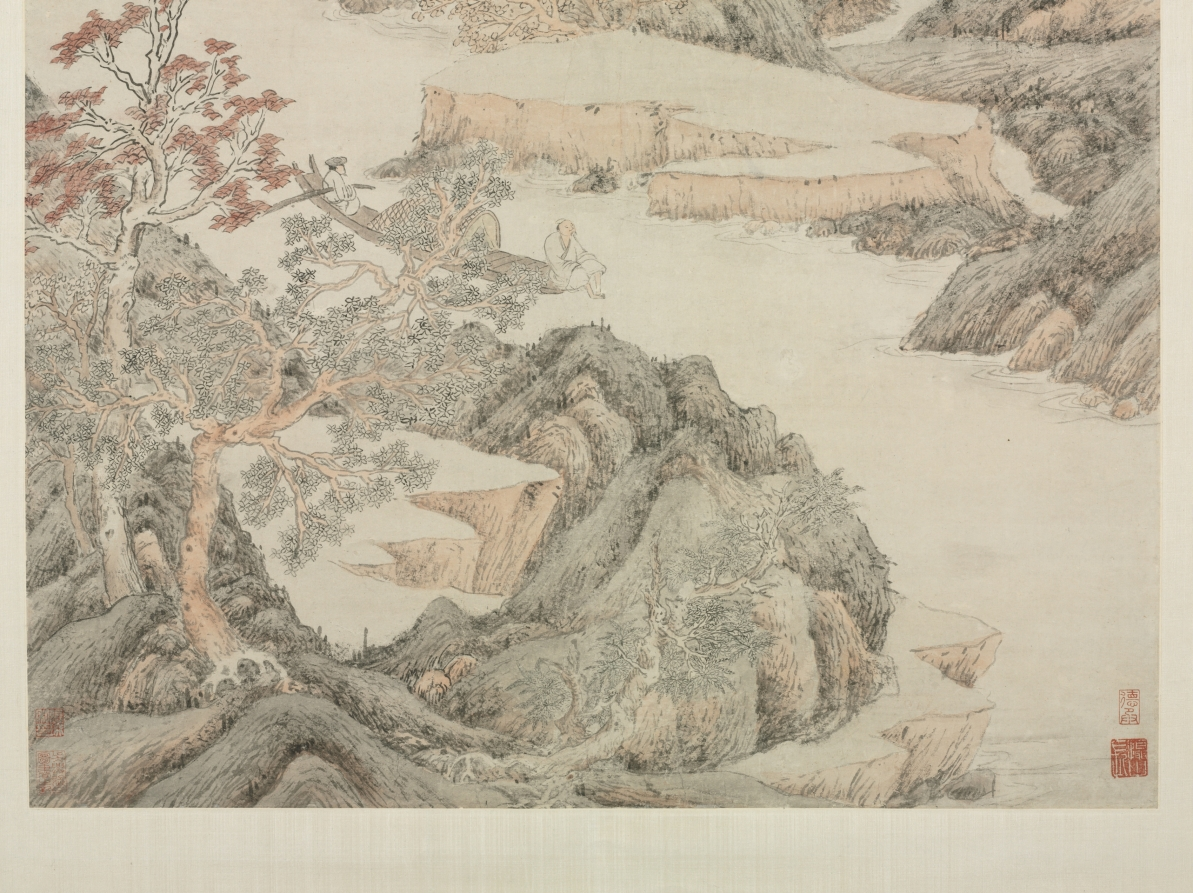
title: Washing the Feet (from the Dusty World)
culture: China, Ming dynasty (1368–1644)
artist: Wen Boren (Chinese, 1502–1575)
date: 1570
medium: Hanging scroll mounted on a panel; ink and color on paper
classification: Painting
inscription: Artist's inscription, signature, and 4 seals: Shaking one's clothes on a thousand-jen peak,/ Washing one's feet in a ten-thousand-li stream. In the gengwu year of the Longqing era [1570], fifteenth day of the tenth month, Wufeng shanren, Wen Boren recorded a special occasion. [2 seals] Wufeng shanren; Wen Boren Te-ch'eng chang. [2 seals, lower right corner] Te-ch'eng; She-shan chang. trans. HR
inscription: 2 additional seals of Zhang Heng 張珩 (1915-1963)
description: A scholar on a boat in the middle ground bathes his feet in the cooling stream. The vast river scene is depicted from a high viewing point. The motif of a scholar washing his feet illustrates the phrase, “When the waters of the Canglang are clear, I wash my capstrings. When the waters of the Canglang are muddy, I wash my feet [only]” (from Songs of Chu, written before 256 BC). The passage evokes the image of the virtuous scholar-official who avoids government service when the ruler is corrupt (the rivers are muddy) and resumes service (washing my capstrings) when the waters are clear. Whether the artist here alludes to unfavorable times of government is not clear.